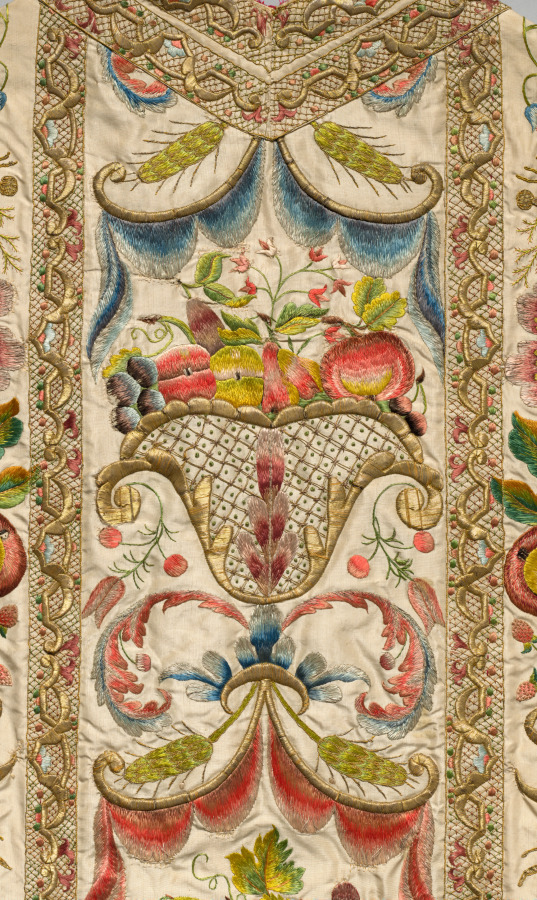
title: Chasuble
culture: Italy or Spain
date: 1700s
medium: Silk and metallic threads: embroidery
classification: Embroidery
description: The chasuble’s exquisite symmetrical decoration highlights its central panel where three illusionary gold containers hold skillfully shaded fruit in pastel silk tones. Delicately curving motifs enhance the side panels along with finely stitched strawberries in so-called French knots. This liturgical chasuble and other vestments, worn over a white alb with lace, were embroidered by professional specialists, such as experts who shaded colored silks or secured gold thread, in early versions of assembly lines that were usually in secular workrooms or in convents. The church or commissioner supplied the raw materials and paid a fee for the work.